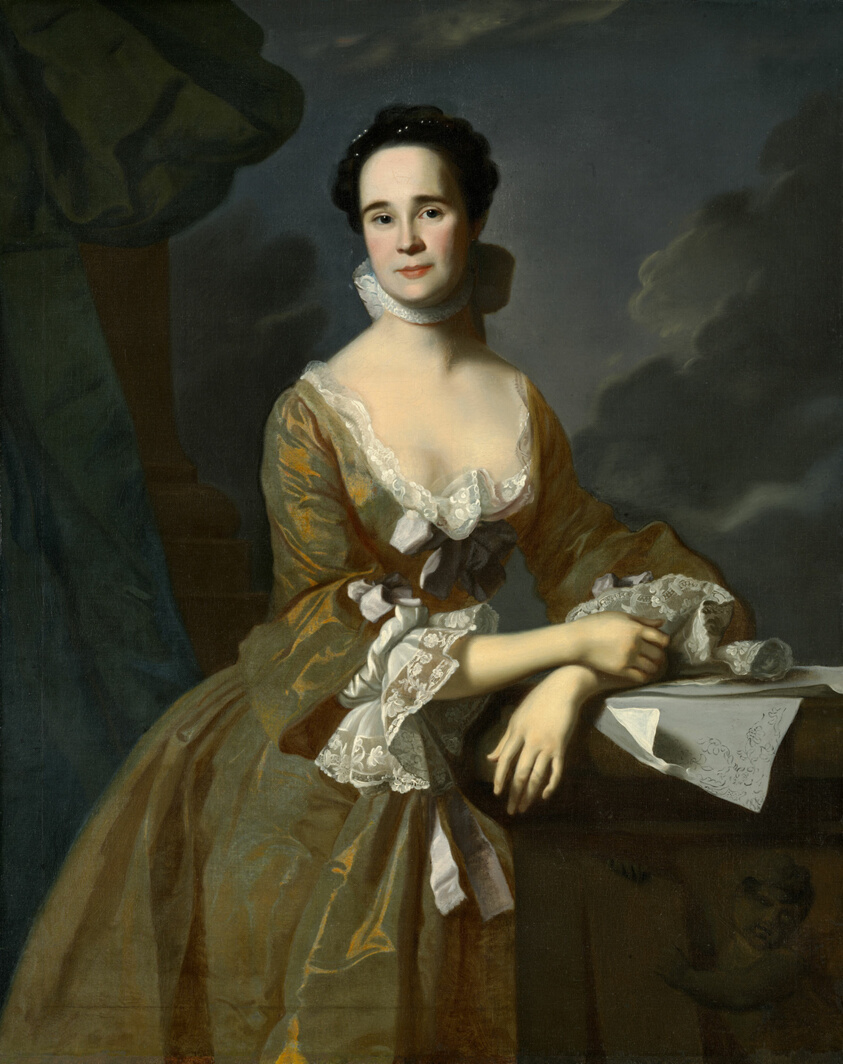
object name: Painting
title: Mrs. Daniel Hubbard (Mary Greene)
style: american colonial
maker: John Singleton Copley (American, 1738–1815)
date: c. 1764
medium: Oil on canvas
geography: England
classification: painting; american arts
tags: fashion, dresses, portraits, women, people